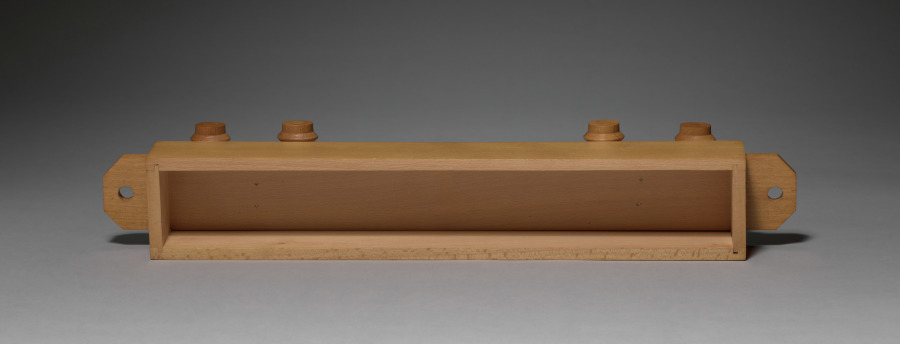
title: Train Car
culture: Denmark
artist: Boysen Toys (Danish)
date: 1900s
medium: wood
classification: Wood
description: Credit line: John D. Rockefeller General Education Board Grant II